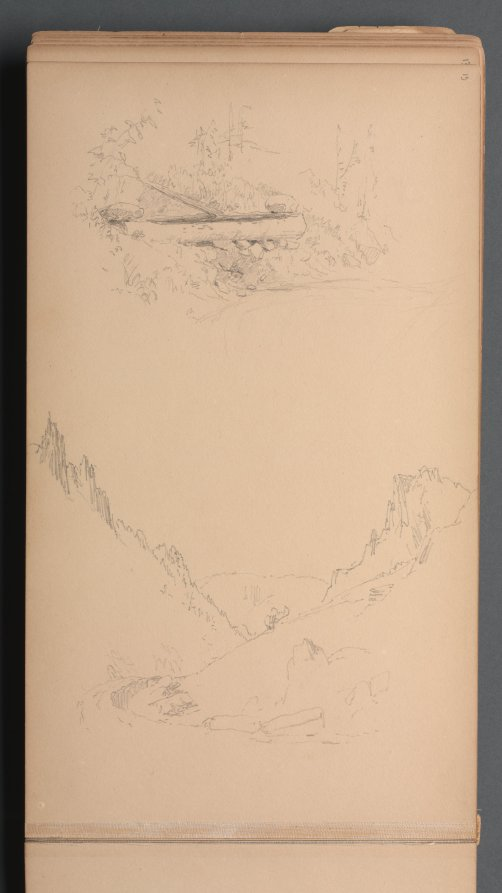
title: Sketchbook, page 15: Landscapes, Berlin Falls ?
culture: America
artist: Sanford Robinson Gifford (American, 1823–1880)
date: 1859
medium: graphite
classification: Bound Volume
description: Gifford was an American landscape painter belonging to the second generation of Hudson River school artists. Based in New York City with a studio at the Tenth Street Studio Building, Gifford took annual summer trips to the Catskills, the Adirondacks, and other scenic locations in New England. This sketchbook accompanied the artist on his expedition in 1859 to New Hampshire and Maine, where he drew sites such as Dixville Notch, the White Mountains, and Peaks Island, Casco Bay. Gifford used such graphite studies as the basis for oil paintings worked up in his studio, such as A Home in the Wilderness (1866).